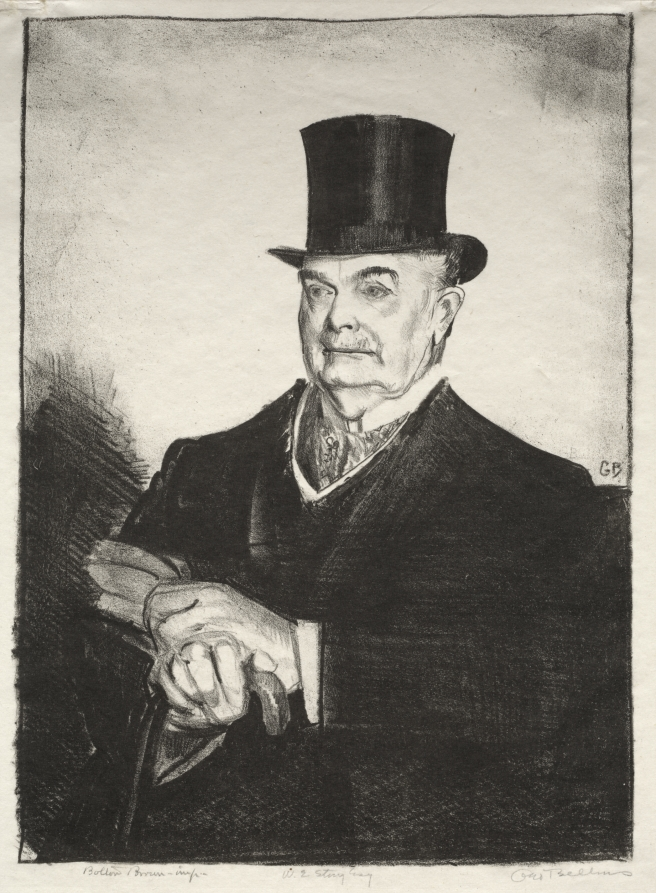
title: W. E. Story, Esq., second state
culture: America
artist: George Bellows (American, 1882–1925)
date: 1921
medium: lithograph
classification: Print